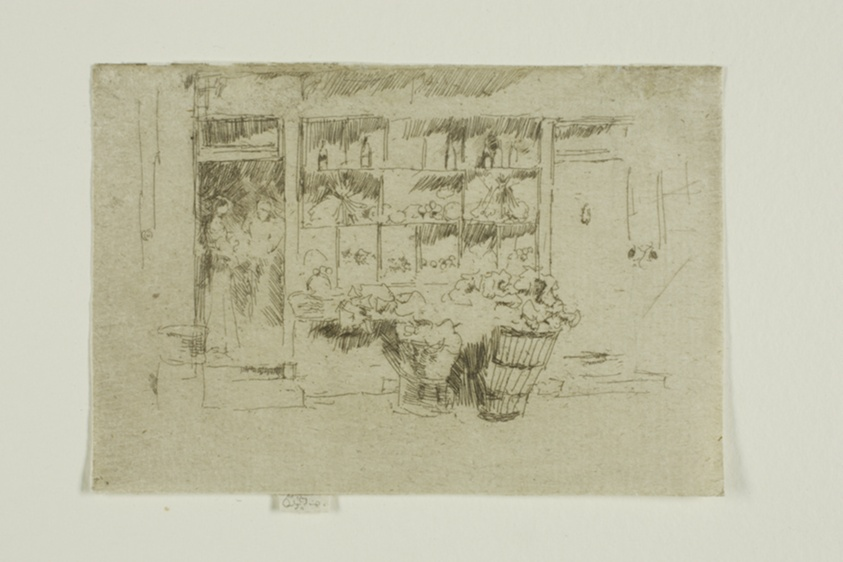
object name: Print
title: Little Greengrocer's Shop, Chelsea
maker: James McNeill Whistler (American, 1834-1903)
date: 1886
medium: Etching and drypoint with foul biting in brown ink on ivory laid paper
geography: United States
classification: etching; drypoint; foul biting; print; prints and drawing; paper